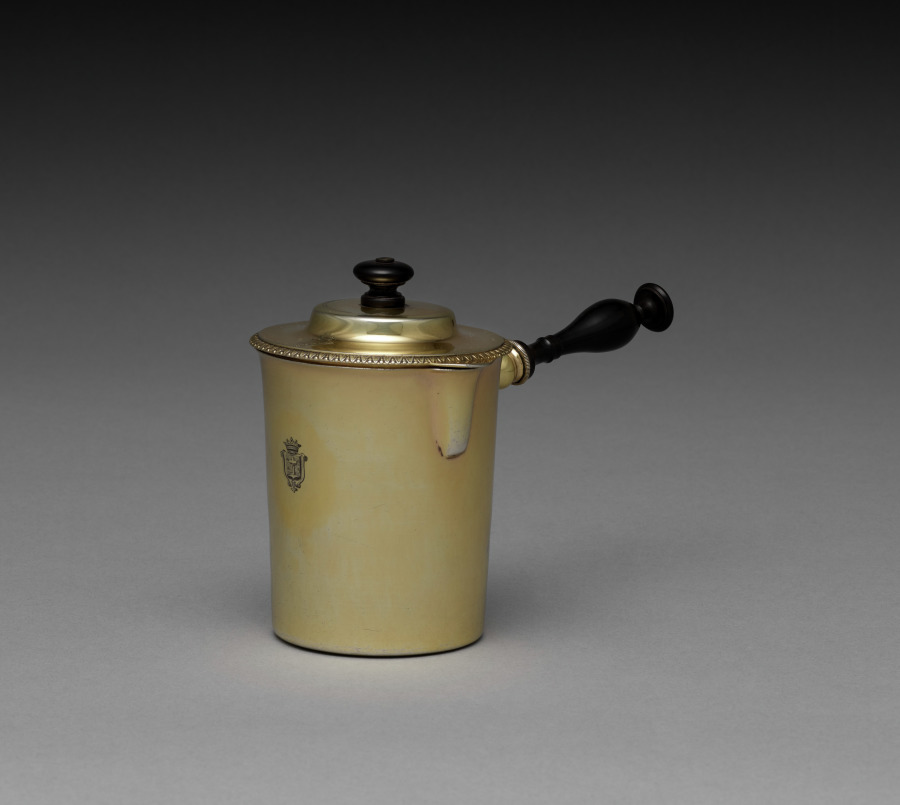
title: Covered Chocolate Pot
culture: France, 19th century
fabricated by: Sixte-Simon Rion (French)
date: c. 1830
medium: silver, wooden handle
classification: Silver